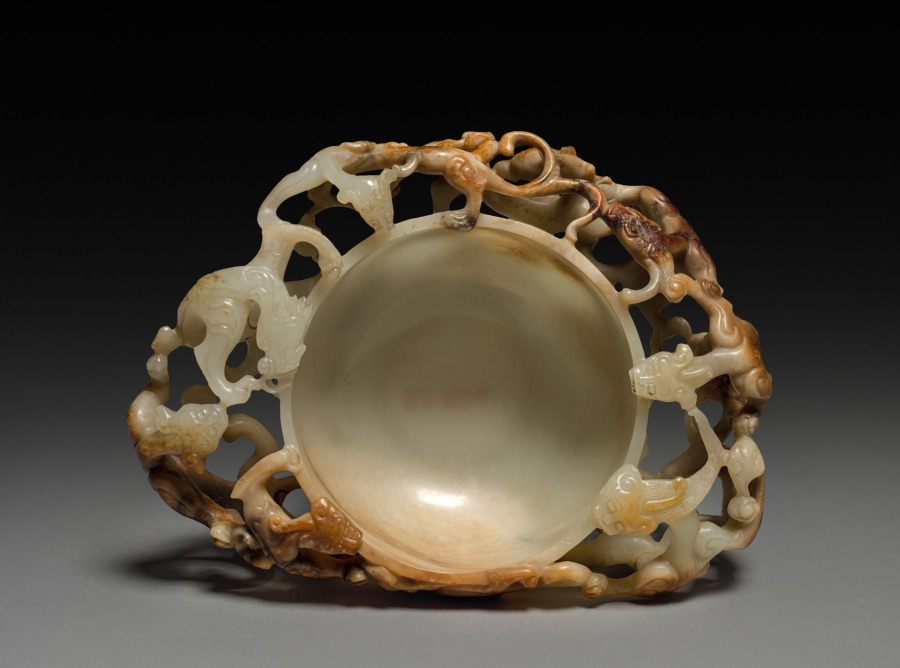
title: Cup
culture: China, Qing dynasty (1644–1911), Qianlong reign (1736–95)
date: 1736–95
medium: jade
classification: Jade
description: In the Qing dynasty, luxury items became more affordable to larger parts of the society, including women, merchants, and literati in nonofficial positions. Imperial patronage and a growing urban population also encouraged consumption of luxury goods and local craftmanship. This cup with open-work interlacing dragons shows the creative mind of the skilled artisan who carved it from a round piece of jade.